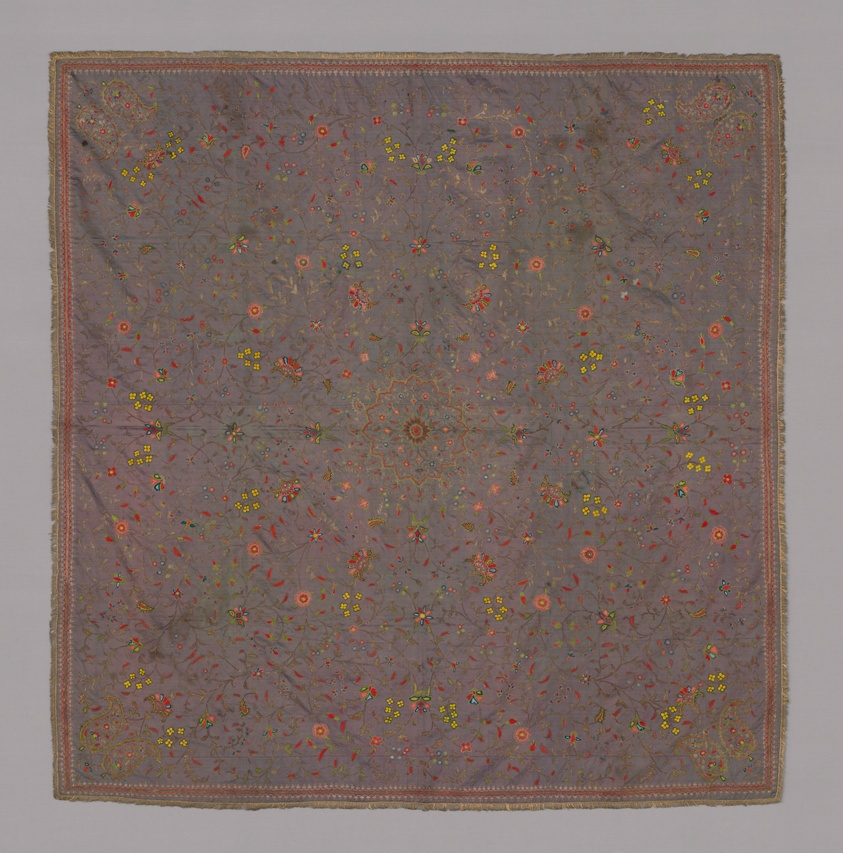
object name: Textile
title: Cover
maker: Iran (Persia)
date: 19th century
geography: Iran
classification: textile; needlework (visual works); weaving